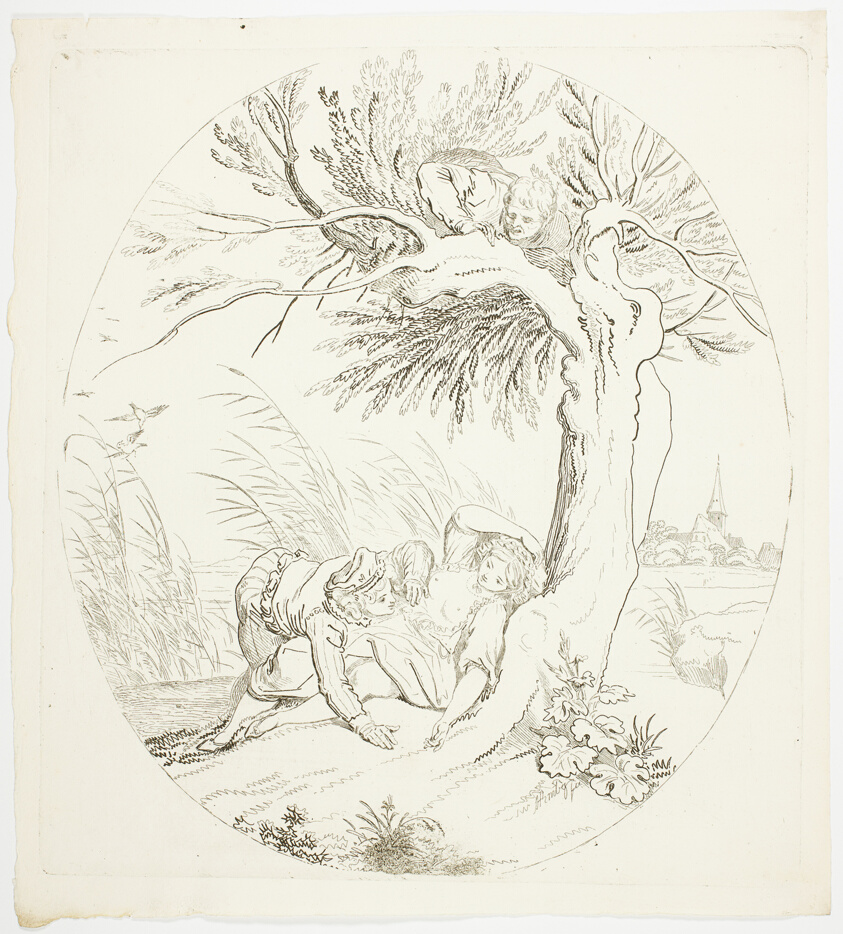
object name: Print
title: Unobserved Man Spying on Reclining Lovers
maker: Johann Heinrich Ramberg (German, 1763-1840)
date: 1795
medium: Etching on cream wove paper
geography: Germany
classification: etching; print; prints and drawing